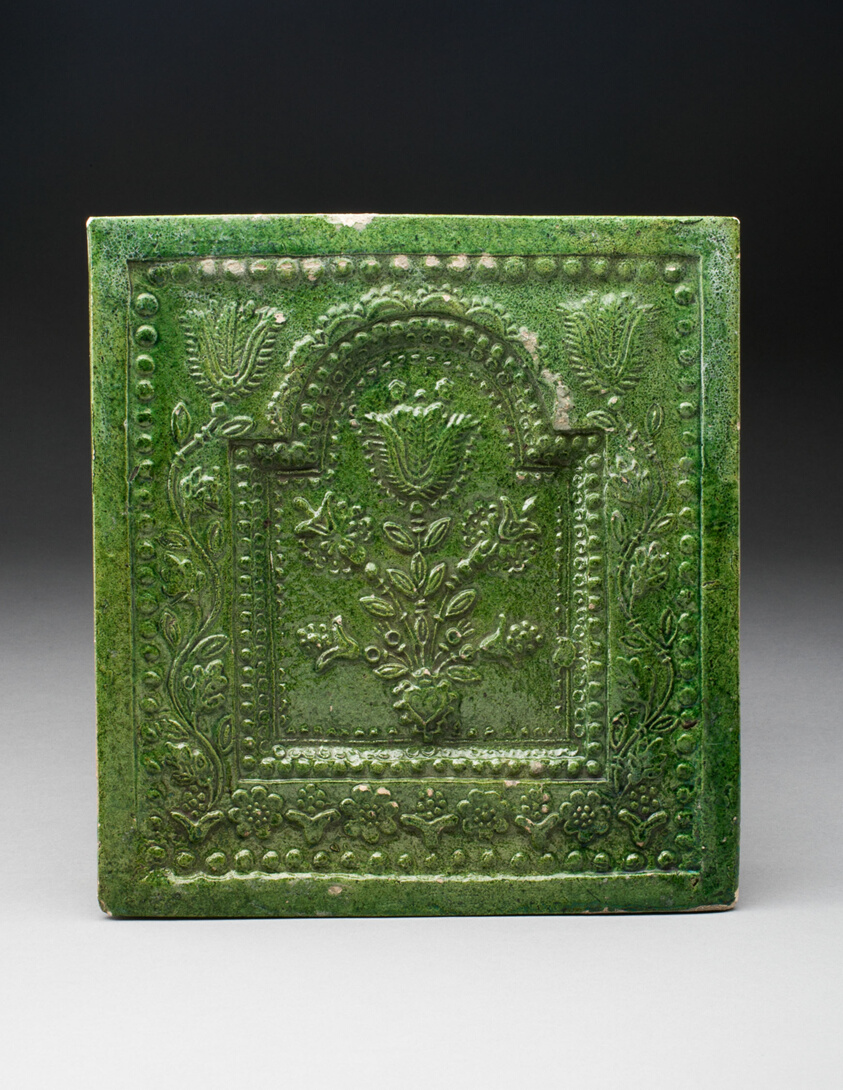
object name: Ceramics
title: Stove Tile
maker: Germany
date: c. 1600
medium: Lead-glazed earthenware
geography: Germany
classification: porcelain; ceramics